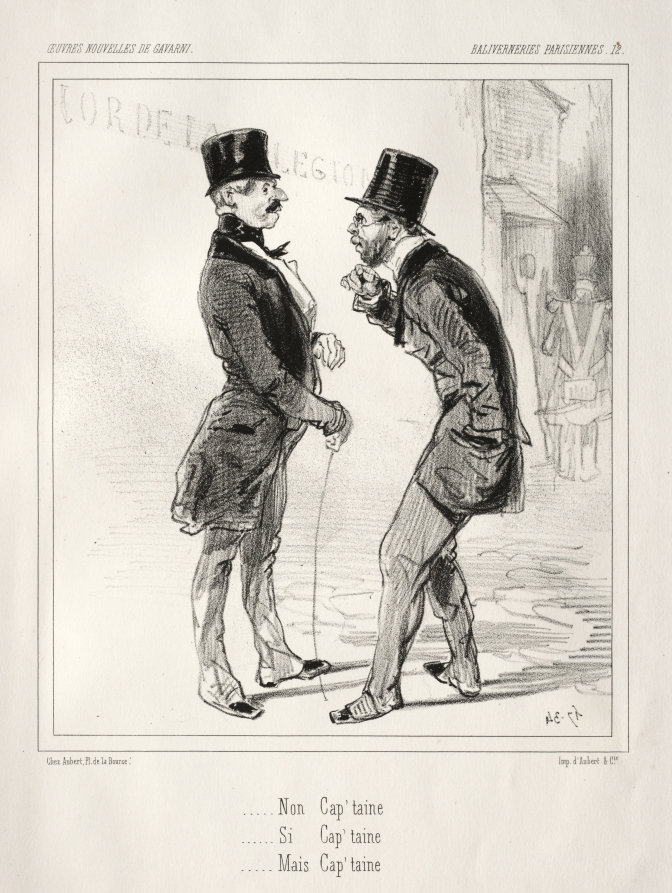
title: Baliverneries Parisiennes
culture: France, 19th century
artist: Paul Gavarni (French, 1804–1866)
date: c. 1847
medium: lithograph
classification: Print